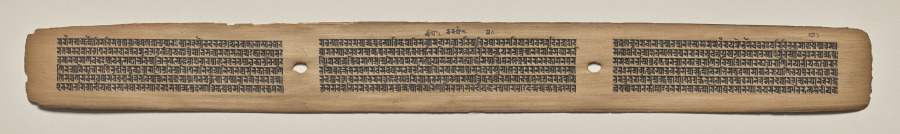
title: Text, Folio 129 (recto), from a Manuscript of the Perfection of Wisdom in Eight Thousand Lines (Ashtasahasrika Prajnaparamita-sutra)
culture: Eastern India, Bihar, Vikramashila Monastery. Painting: Nepal, Kathmandu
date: Sunday, September 14, 1119 (year 239 of the Newar Samvat in the month of Ashvina)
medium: gum tempera and ink on palm leaves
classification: Painting